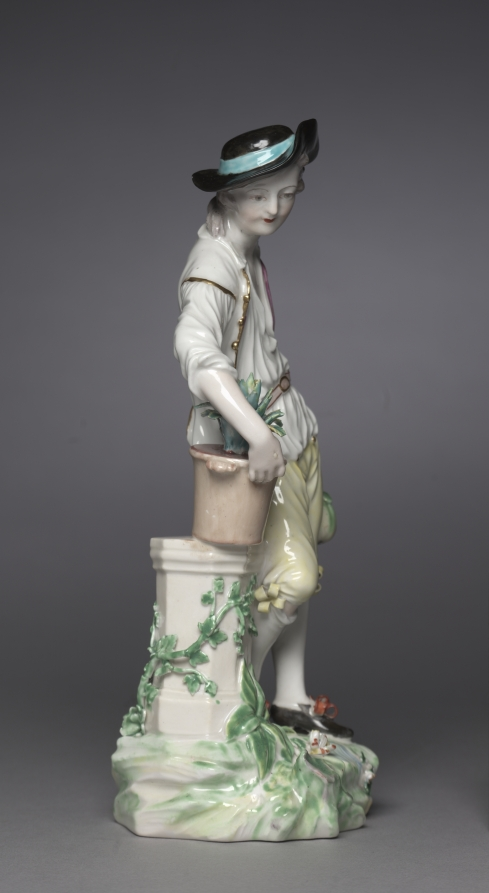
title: Earth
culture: England, Derby, 18th century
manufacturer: Derby Porcelain Factory (Chelsea-Derby Period, 1770–84)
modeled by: Pierre Stèphan (Swiss, active 1760–98)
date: c. 1775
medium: soft-paste porcelain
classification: Ceramic